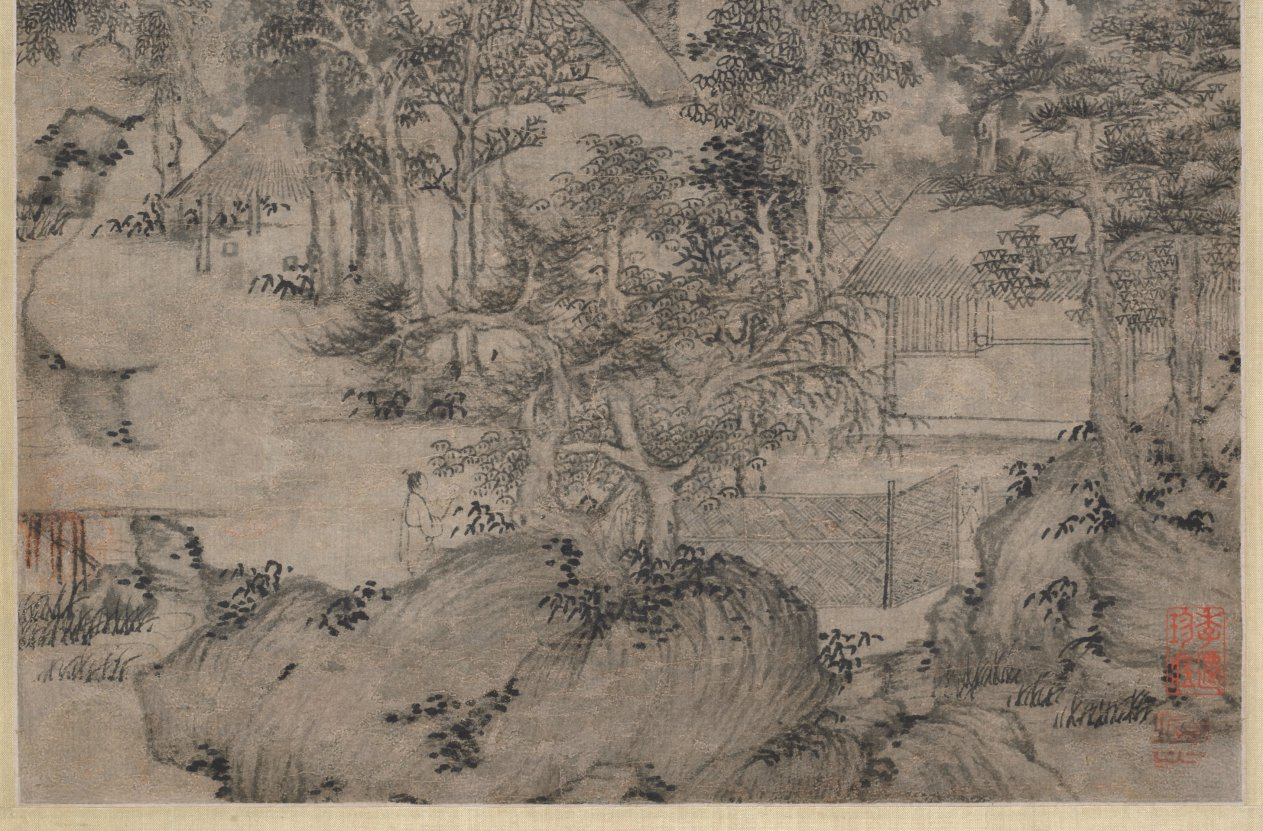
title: Streams and Mountains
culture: China, Yuan dynasty (1271-1368)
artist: Xu Ben (Chinese, 1335–1380)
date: 1372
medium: hanging scroll, ink on paper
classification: Painting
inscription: 綠樹黃鸝處處山， 偶從谿上看雲還。/ 人生未許全無事， 纔得登臨便是閑。 壬子七月十日徐賁為吉夫先生畫 並詩共上 [印] 幼文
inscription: Label on mounting probably by Liang Qingbiao 梁清標 (1620–1691).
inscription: 4 additional inscriptions and 9 additional seals: 1 poem of Xie Hui 謝徽 (c. 2nd half 14th c.); 1 poem and 1 seal of Gao Qi 高啟 (1336–1374); 1 poem and 1 seal of Lu Zhen 盧貞 (c. late 14th c.); 1 poem of Huang Zai 黃載; 3 seals of Liang Qingbiao 梁清標 (1620–1691); 1 seal of Wang Jiqian [C. C. Wang] 王季遷 (1907–2003); 3 seals unidentified.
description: Like many literati of the late Yuan and early Ming dynasties, Xu Ben was entangled with the perils of dynastic change as well as the ups and downs of his official career. It was mainly through the art of painting and poetry, as well as the ideal of reclusion, that he sought feelings of exhilaration and shared them with his friends. Xu created this monumental landscape during one of his periods of reclusion. His innumerable “hemp-fiber” texture strokes create a unifying rhythm among the towering mountains with tightly knit masses of rocks. Nestled among shady trees at the base of the mountain is a rustic retreat, which a scholar approaches on foot to visit with the hermit. Among the five inscriptions at the top of the painting is one by the artist himself. He dedicated the painting to someone named Jifu 吉夫 and recorded a poem in praise of mountains. Green trees, yellow orioles, everywhere are mountains; Aimlessly I return from the stream, where I watched the clouds. Man's life does not allow unbroken ease, But to be able to be high up in the mountain, this is leisure.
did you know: An attendant opens a reed gate to welcome the scholar with a walking stick approaching the rustic retreat.